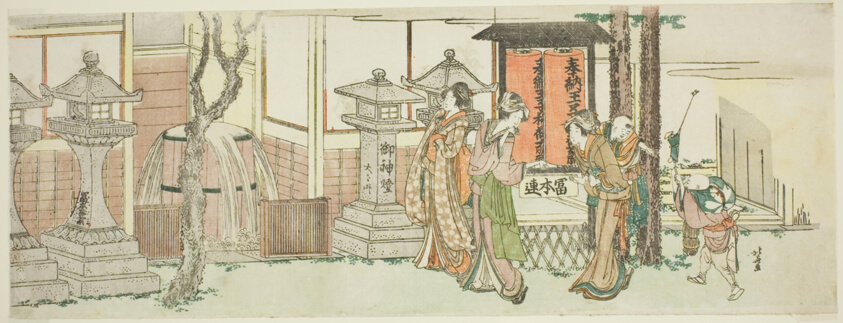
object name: Print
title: Visiting Oji Inari Shrine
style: Japanese (culture or style)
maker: Katsushika Hokusai 葛飾 北斎; Japanese, 1760-1849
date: 1801/05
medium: Color woodblock print; nagaban, surimono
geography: Japan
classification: woodblock print; print; asian art